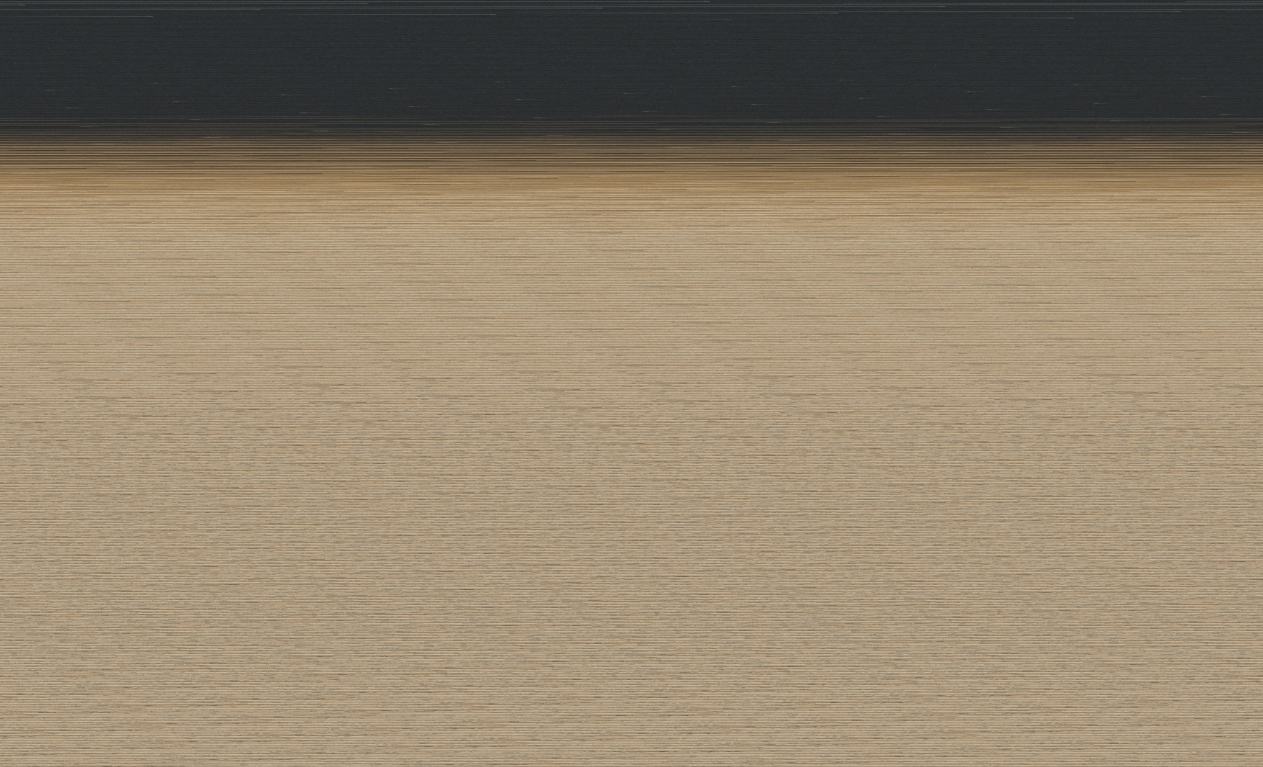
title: Scholar-Hermits in the Autumn Mountains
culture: China, Ming dynasty (1368–1644)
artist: Tang Yin (Chinese, 1470–1523)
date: 1500–1510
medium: handscroll, ink and light color on silk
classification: Painting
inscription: Artist's signature and 2 seals at end of scroll: Tang Yin [seals] T'ang Po-hu; T'ang Tzu'wei t'u-shu.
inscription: Title on frontispiece by Li Cho-kung (dates unknown).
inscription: 1 colophon and 11 additional seals: 1 colophon dated 1915 of Wu Tso-hsi (19th-20th c.); 2 seals of Gao Qifeng 高奇峰 (1889–1933); 5 seals of C. C. Wang 王季遷 (1907–2003); 4 seals unidentified.